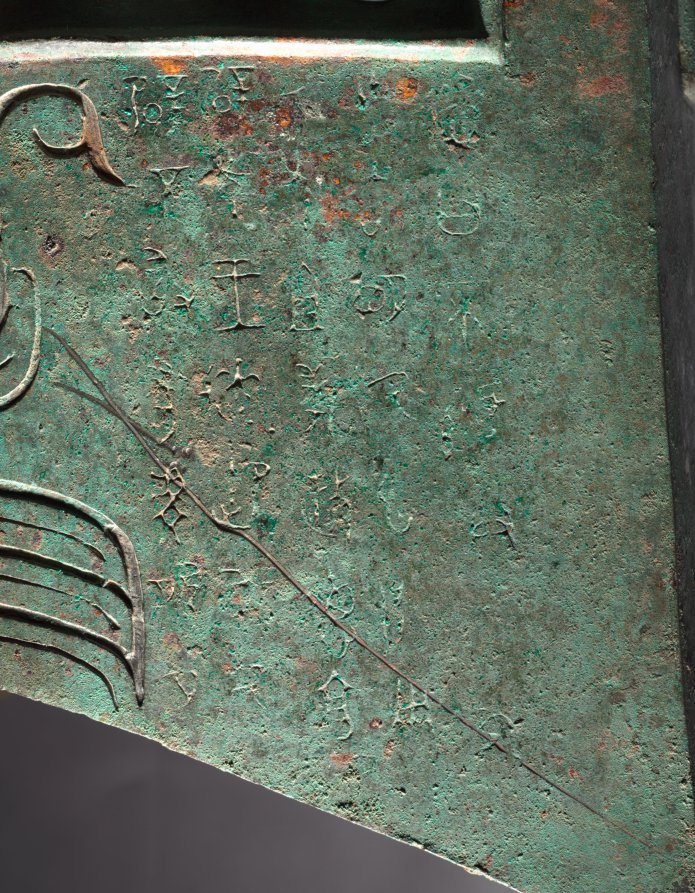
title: Bell (Lai Zhong)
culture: China, Shaanxi province, Meixian, Western Zhou dynasty (c. 1046–771 BCE)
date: c. 800–700 BCE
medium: bronze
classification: Metalwork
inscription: Lai proclaimed: "Great and illustrious was my august late father who made his heart clean following the disciplined virtue of his forefathers and dutifully served the past king. I, Lai, now succeed him in service and dare not fail. Respectfully, from dawn to dusk I will earnestly--even unto death--serve the Son of Heaven, taking as a model the obligation of my forefathers." I, Lai, was presented with many things. Then came the [king's] gracious command: "Manage the fisheries and forests of the realm." "I, Lai, dare to respond to the great, illustrious, sagely, and gracious favor of the Son of Heaven, extolling him and using this as cause to make for my august late father Gongshu a set of harmonized bells. Ding, dong, bing, bong, ding, dong, bing, bong. May they be used in acts of piety, reverently gladdening past luminaries. May the past luminaries who dwell on high help perpetuate this command, sending down upon me good fortune, tranquility, and purity. May I, Lai, live long in service to the Son of Heaven." May sons' sons and grandsons' grandsons forever treasure these [bells].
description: In ancient China, music and ritual had political significance and were linked inseparably to the power of states. During the Zhou dynasty, bronze bells were made in sets of eight to sixty bells. This bell is the second largest from a set of eight. This bell bears an inscription of 118 characters about its owner, Lai, and why it was cast. Lai's ancestors dutifully served the Western Zhou royal court, and he was granted a hereditary position by the "Son of Heaven" (the ruler). To express filial piety, Lai commissioned a set of bells as an offering to his father, Gongshu, in the hope that they would be forever treasured by future generations. This important inscription also provides an early example of Chinese calligraphy highlighting the purely abstract lines and construction of characters.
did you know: The technical sophistication of the unusual lens-shaped cavity allowed the bell to produce two different tones.